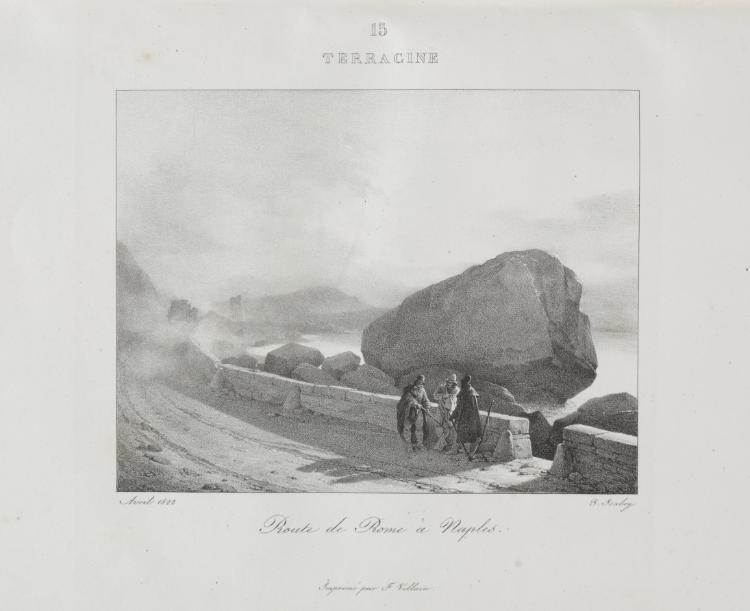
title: Voyage en Italie en 1822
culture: France, 19th century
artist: Jean-Baptiste Isabey (French, 1767–1855)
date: 1833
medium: lithograph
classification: Bound Volume